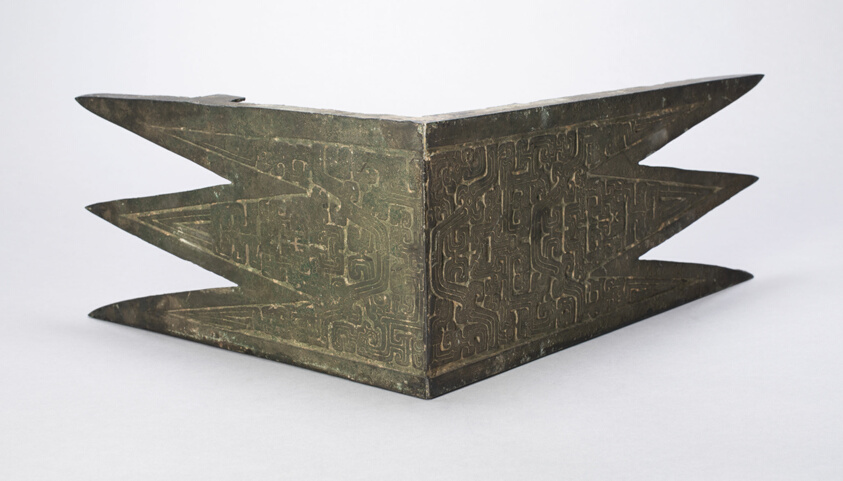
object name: Architectural fragment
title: Architectural Fitting (Gong)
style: Chinese (culture or style)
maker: China, Qishan county, Shaanxi province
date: Eastern Zhou dynasty, Spring and Autumn period (770–481 B.C.), 7th century B.C.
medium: Bronze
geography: China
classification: architectural fragment